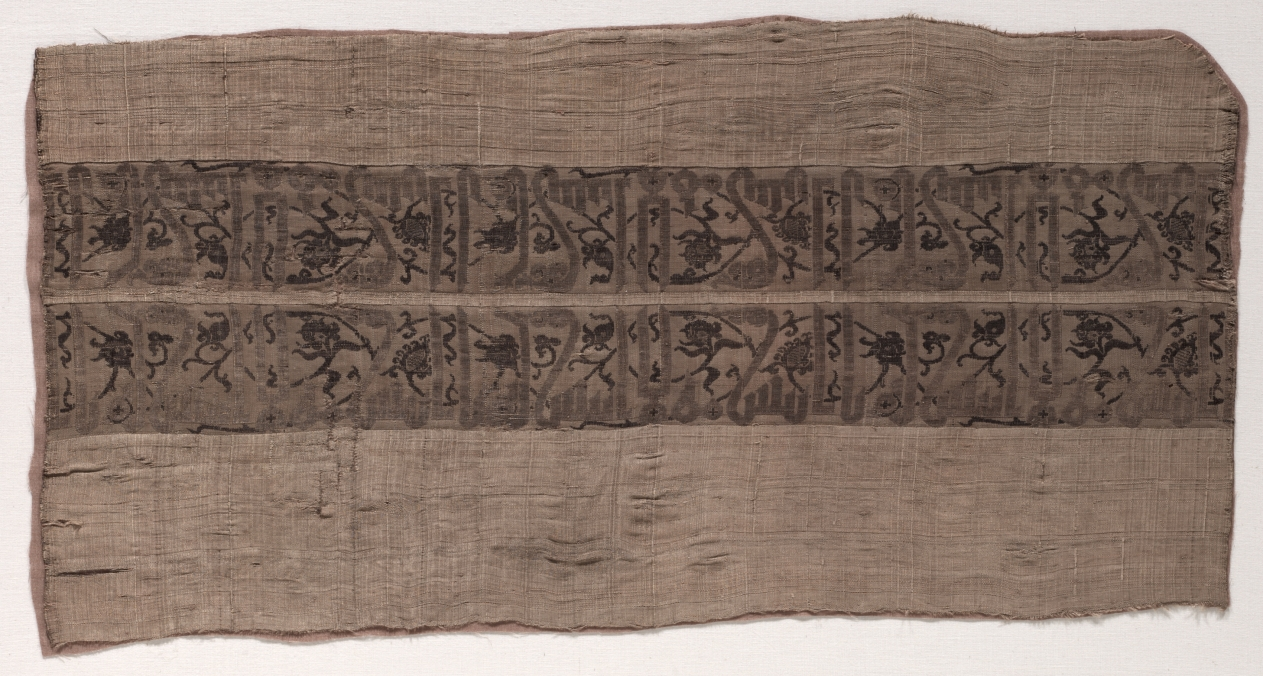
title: Fragment with Inscription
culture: Iran, in the style of the Buyid period (945–1055)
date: before 1968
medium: Silk: lampas weave on compound tabby ground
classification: Textile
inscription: ya anis man la anis lahu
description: Two rows of foliated inscription in medium tan appear on a tan ground. The foliage is in dark brown. The second row is a mirror image of the orthograde inscription.